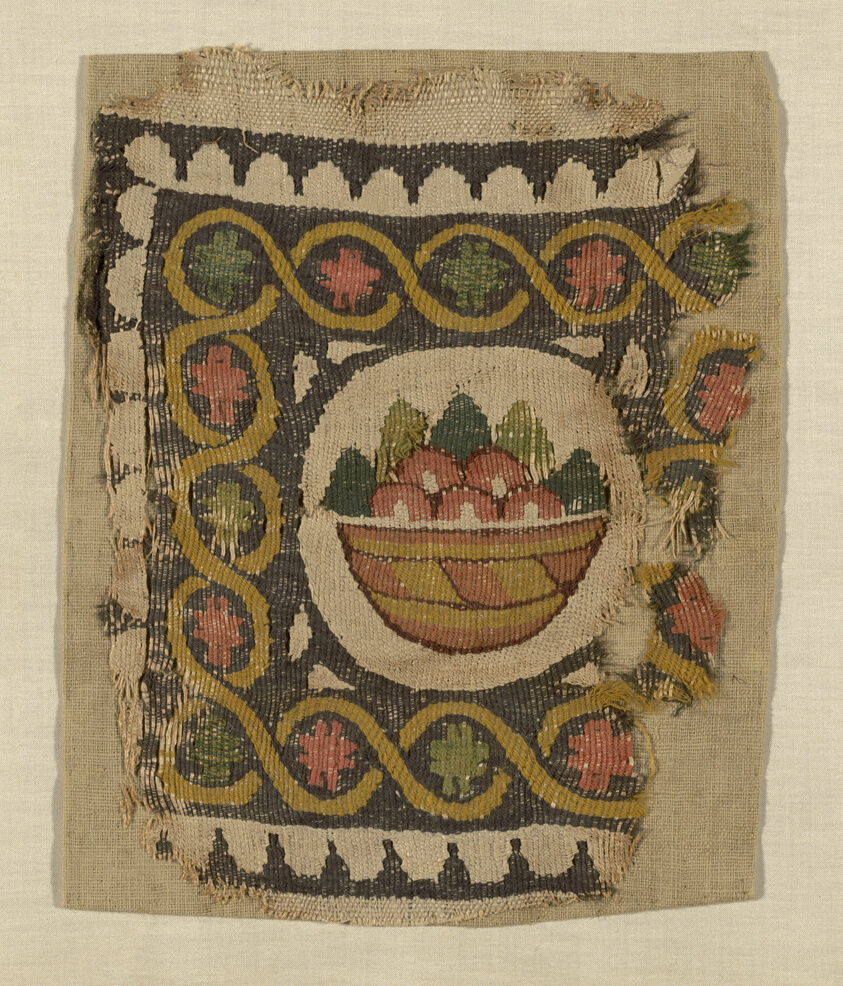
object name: Textile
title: Fragment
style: roman period (egyptian)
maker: Coptic (Egypt)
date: Roman period (30 B.C.– 641 A.D.)/Arab period (641–969), 5th/6th century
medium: Linen and wool, tapestry weave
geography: Egypt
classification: textile; weaving